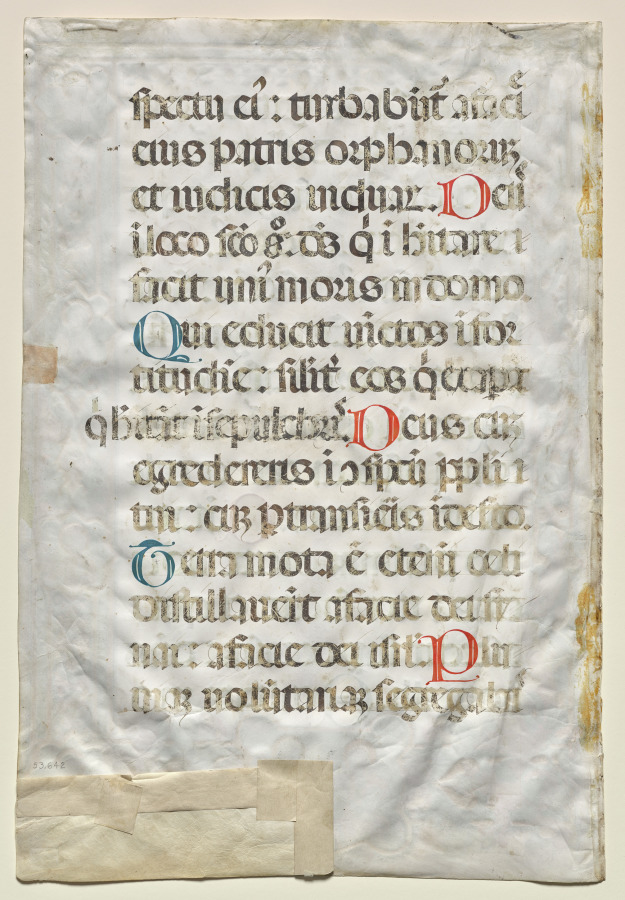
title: Leaf from a Psalter with Full Border with Medallions (Annunciation, SS. Jerome, Clare, Sebastian and Bernardino) and Historiated Initial (E): Virgin and Child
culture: Italy, Umbria or Tuscany, 15th century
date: 1475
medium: ink, tempera, and gold on parchment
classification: Manuscript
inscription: (Front:) Exurgat Deus, et dissipentur inimici ejus Sicut deficit fumus deficiant sicut fluit cera a facie ignis sic pereant peccatores a facie Dei Et iusti epulentur exultent in conspectu Dei delectentur in Laetitia Cantate Deo psalmum dicite nomini eius iter facite ei qui ascendit super occasum Dominus nomen illi et exultate in conspectu (Back:) eius turbabuntur a facie eius Patris orfanorum et iudicis viduarum Deus in loco sancto suo Deus inhabitare facit unius moris in domo qui educit vinctos in fortitudine similiter eos qui exasperant qui habitant in sepulchris Deus cum egredereris in conspectu populi tui cum pertransieris in deserto Terra mota est etenim caeli distillaverunt a facie Dei Sinai a facie Dei Israel Pluviam voluntariam segregabis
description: This leaf contains Psalm 67. The original full manuscript would have held all 150 psalms. Psalters like this were made in a large format for communal prayer. This leaf is richly adorned with an elaborate border with a historiated, or decorated, initial E showing the Madonna and Child. Around the border are Saint Jerome, Saint Clair, Saint Sebastian, and Saint Bernardino, a popular and much-venerated preacher from Siena, Italy. The bottom medallion depicts the Annunciation, or announcement to the Virgin Mary that she would conceive a son by the power of the Holy Spirit. She is shown seated, reading from a book of hours.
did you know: Saint Bernardino, seen in the lower right, was a popular and much-venerated preacher from Siena.